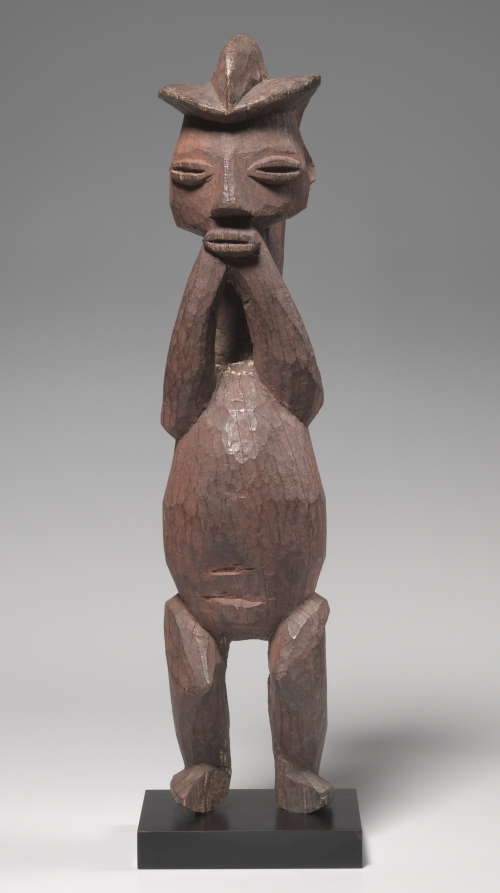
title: Male Figure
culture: Africa, Central Africa, Democratic Republic of Congo, Hungaan-style maker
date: mid- to late 1800s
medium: Wood and colorant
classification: Sculpture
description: Hungaan figures of this size served as guardians of ritual shrines and functioned in rituals to promote fertility, guarantee well-being, and ensure longevity. The striking crested hairstyle imitates a real coiffure or a wig, indicative of status and prestige. The hands supporting the chin identify the figure as a chief who is immersed in thought and contemplation, pondering over his responsibilities.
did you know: The red powdery surface of this figure mimics a red body adornment that mixed ground camwood with palm oil.